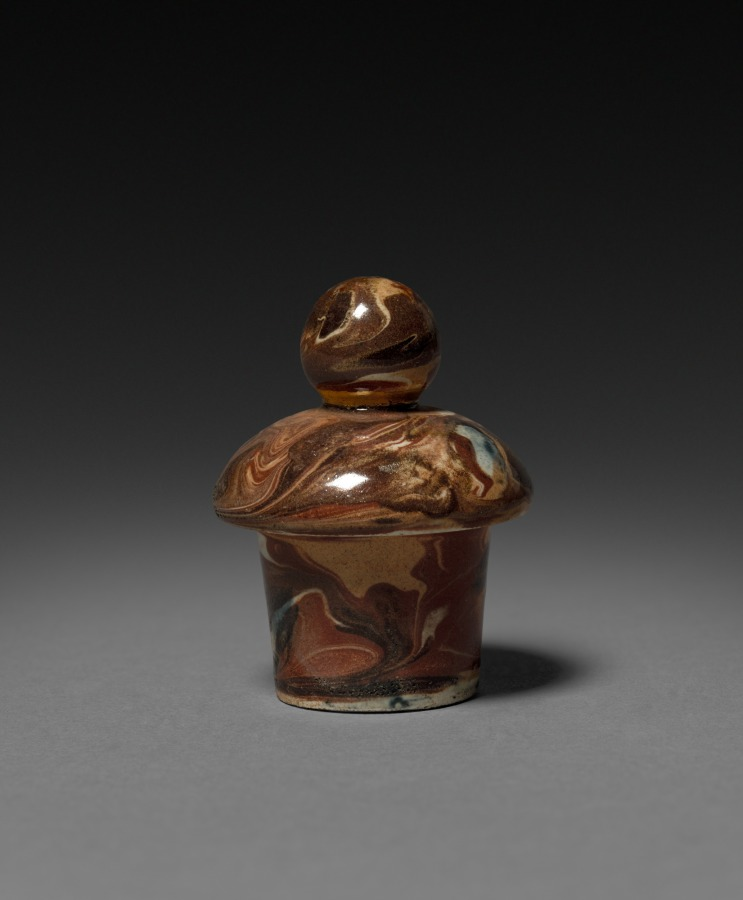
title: Covered for an Agateware Vase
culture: England, Staffordshire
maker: Wedgwood and Bentley (British, Staffordshire, 1769–1780)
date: c. 1770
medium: marbled earthenware (agateware) with gilt decoration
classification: Ceramic